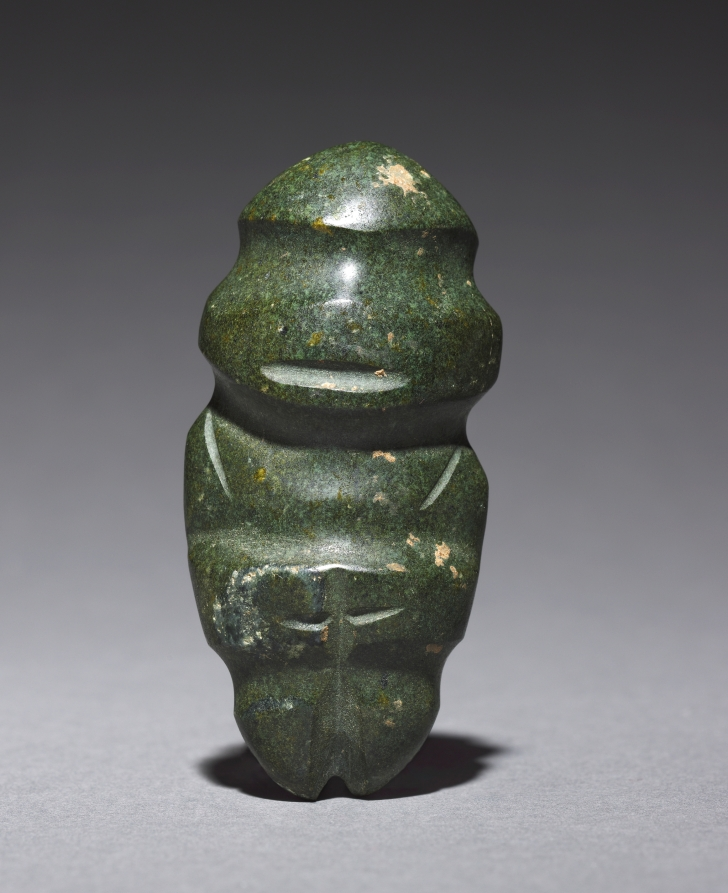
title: Axe Figure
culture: Mesoamerica, Mexico, Guerrero, Mezcala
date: 100 BCE–300 CE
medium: serpentine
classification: Sculpture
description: The Mezcala style takes its name from a river in its homeland, the Guerrero region of western Mexico. The style is known for small-scale sculptures characterized by sleek abstraction and often made of greenstone, one of the most precious materials that Mesoamerican artists worked. Unfortunately, little is known of the sculptures’ meanings and archaeological contexts.